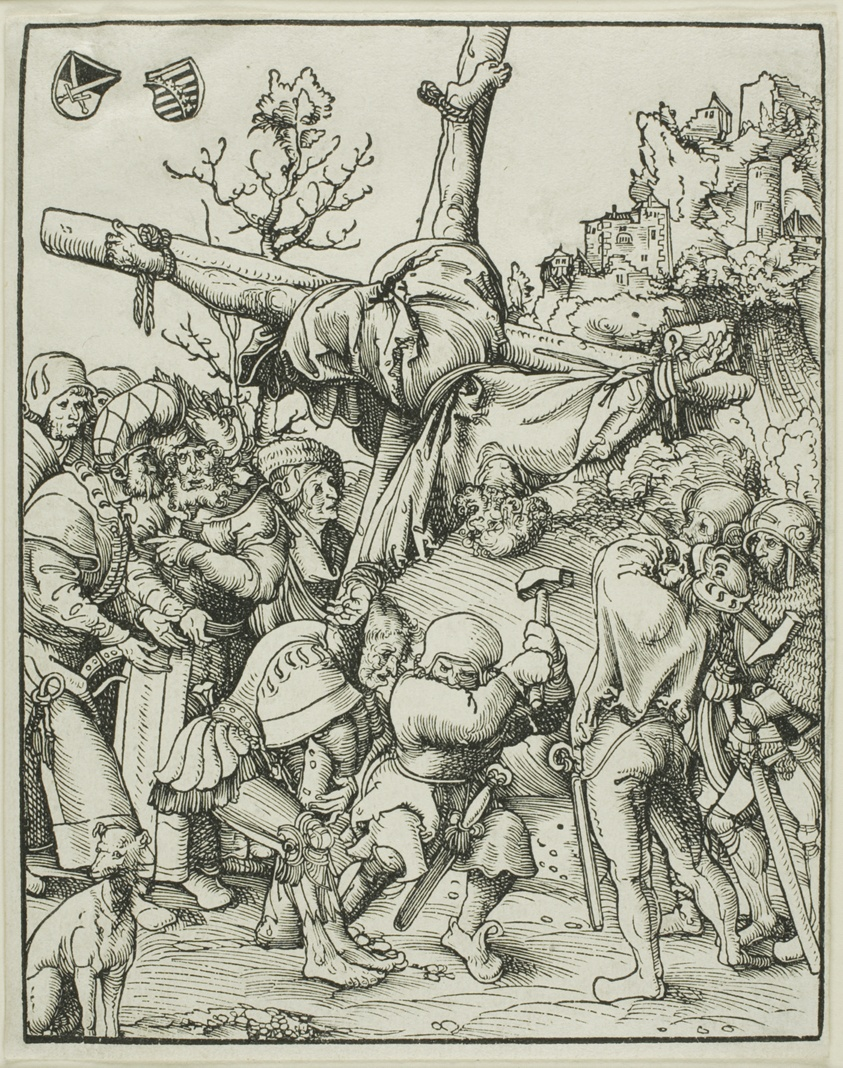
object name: Print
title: Saint Peter, from The Martyrdom of the Apostles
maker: Lucas Cranach the Elder (German, 1472-1553)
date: c. 1512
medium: Woodcut in black on ivory laid paper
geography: Germany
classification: woodcut; print; prints and drawing